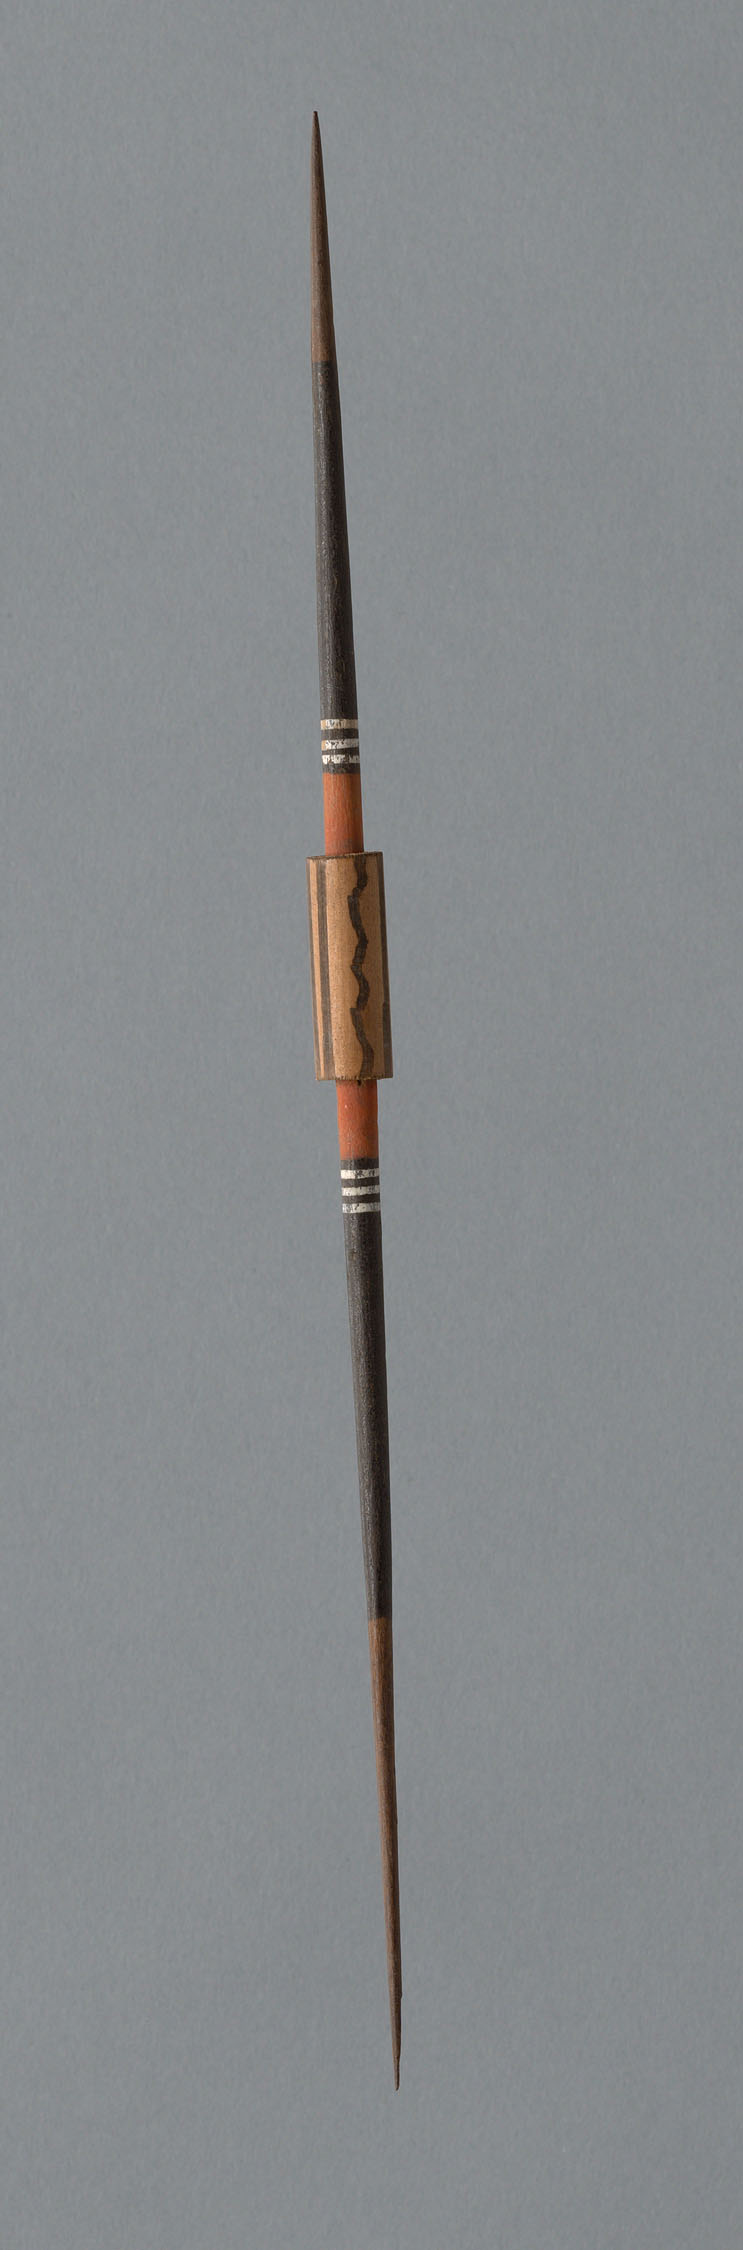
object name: non-art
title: Wooden Spindle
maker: Peru, Possibly central coast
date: 1000/1476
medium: Wood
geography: Peru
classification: spindles (textile working equipment); textile working equipment; accessories (object genre); textile